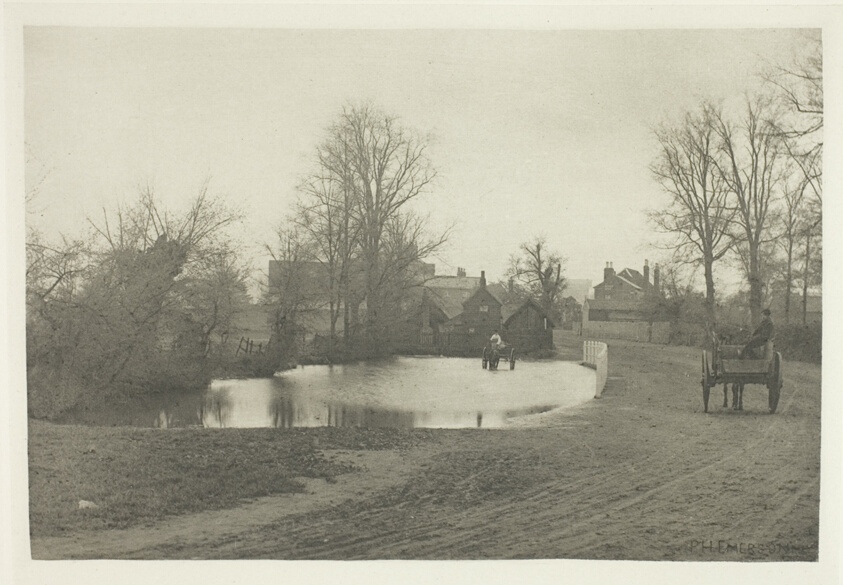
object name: Photograph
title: Hoddesdon, Herts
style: 19th century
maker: Peter Henry Emerson (English, born Cuba, 1856–1936)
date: 1880s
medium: Photogravure, plate XI from the album "The Compleat Angler or the Contemplative Man's Recreation, Volume I" (1888)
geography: England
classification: photogravure; photomechanical process; photography; photograph